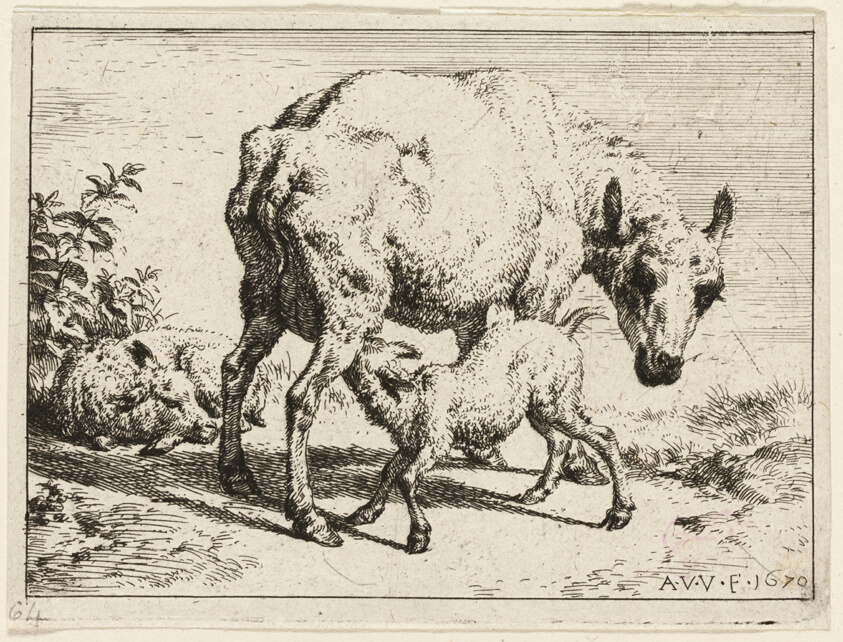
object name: Print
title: The Lamb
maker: Adriaen van de Velde (Dutch, 1636-1672)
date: 1670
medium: Etching in black on ivory wove paper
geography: Holland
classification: etching; print; prints and drawing